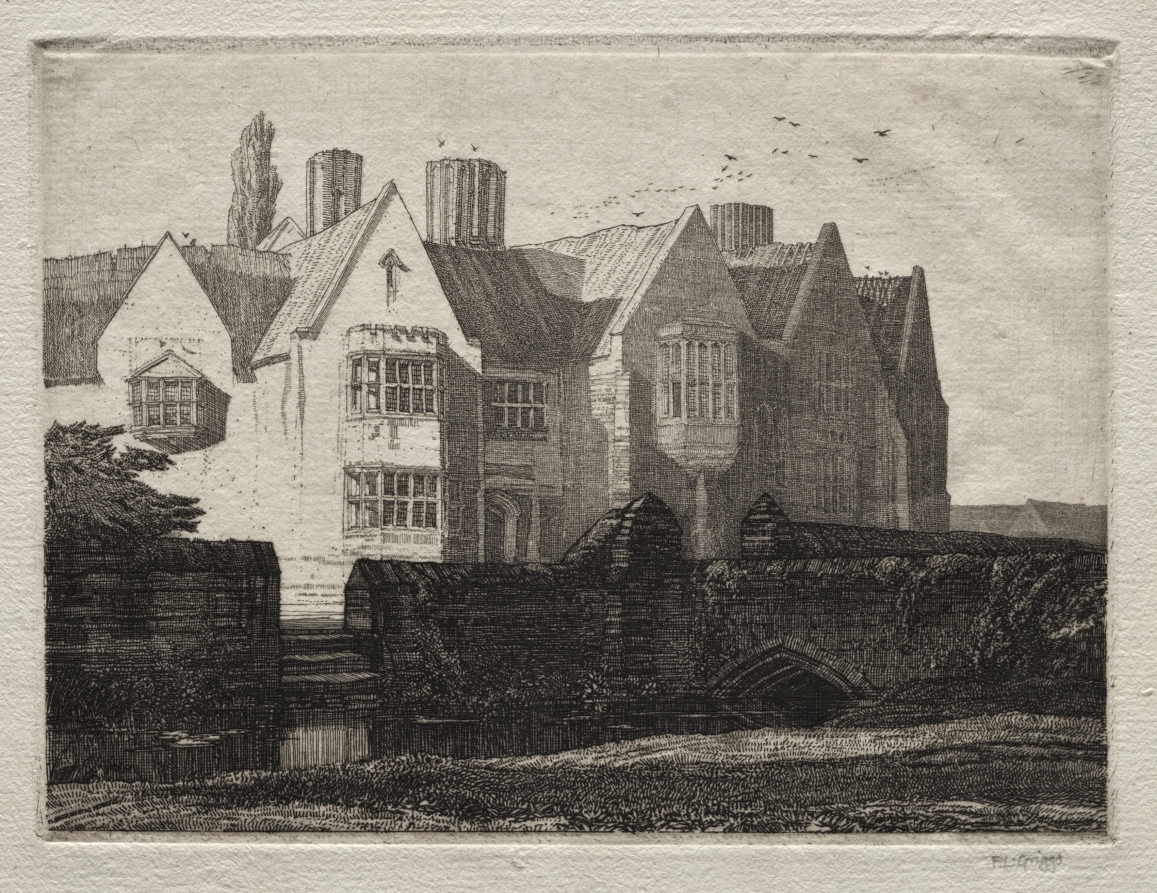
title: Mortmain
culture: England, 20th century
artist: Frederick Landseer Maur Griggs (British, 1876–1938)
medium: etching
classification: Print